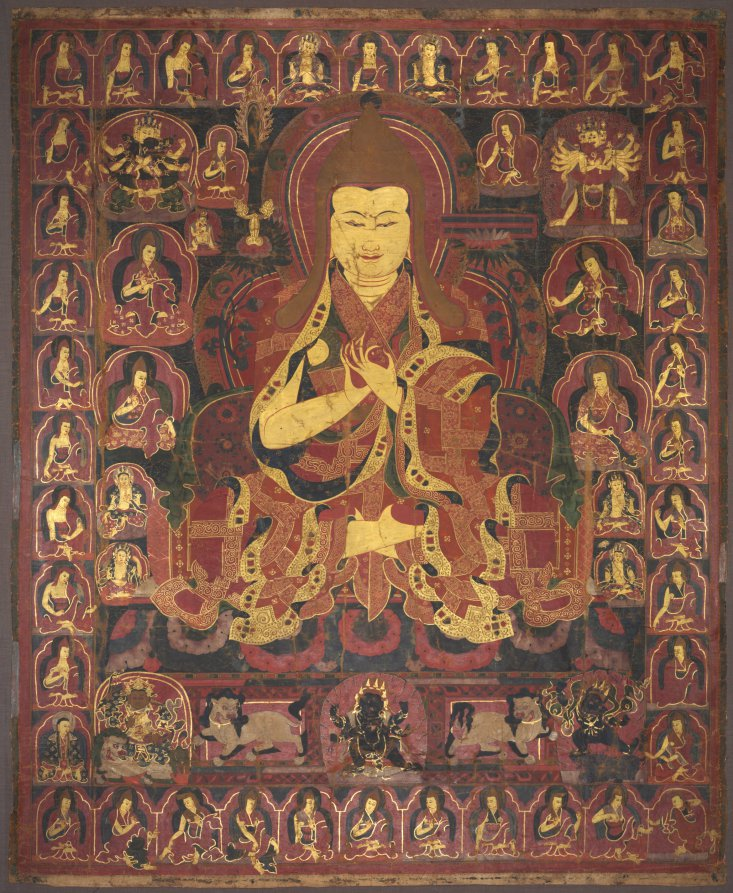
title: Tsong Khapa, Founder of the Geluk Order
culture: Central Tibet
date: c. 1440–70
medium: Gum tempera and gold on cotton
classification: Painting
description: The Buddhist order to which the Dalai Lamas belong was founded by Tsong Khapa (1357–1419), whose image is seen here as the large central figure holding his hands in the teaching mudra. He wears the pointed golden hat that is the insignia for monks of the Geluk order. At the level of his ears are the sword and book, emblems of Manjushri, the bodhisattva of wisdom. These emblems allude to the Tibetan Buddhist tradition that accorded Tsong Khapa the status of being an emanation of Manjushri. This extraordinary, sumptuously rendered painting, made only decades after his death, retains elements of portraiture in the facial features that become formalized in later works, especially from the mid-1600s onward, when the Geluk monks dominated the Tibetan theocracy. He is surrounded by lineage masters, many in lively gestures of debate, whose analyses of doctrines and practices led to Tsong Khapa's final formulation of the Lam Rim text on the stages of the path to enlightenment, which is foundational to the Geluk order.